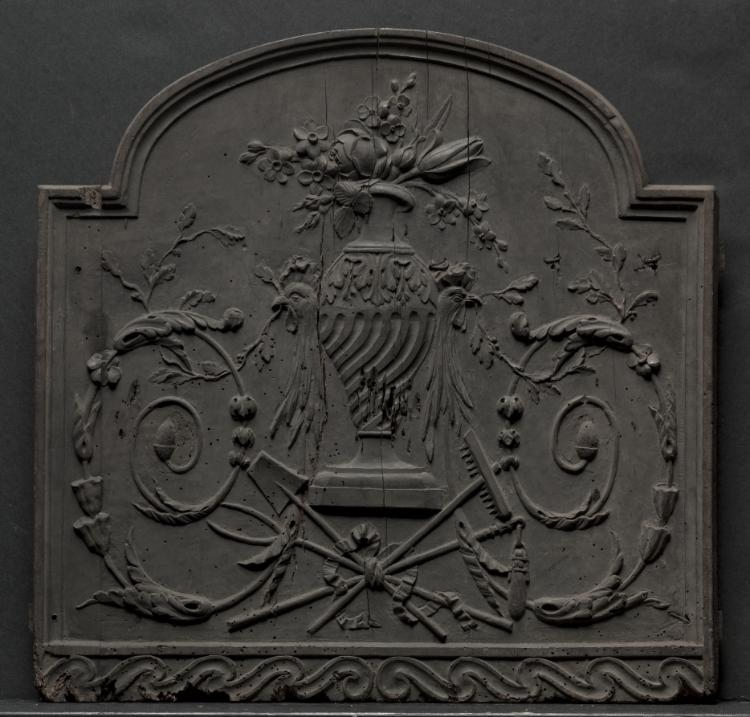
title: Carved Wood Panel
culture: France, 18th century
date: 1700s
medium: wood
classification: Furniture and woodwork